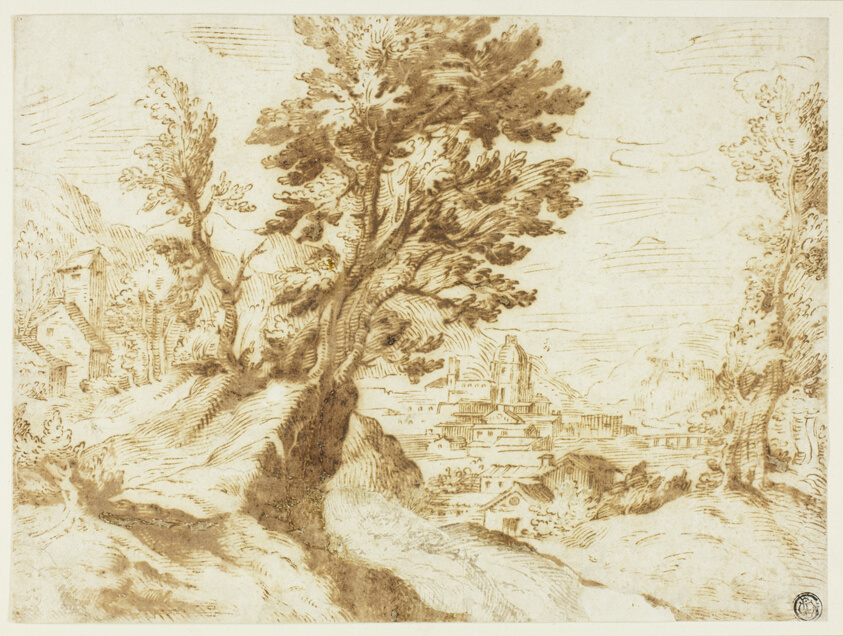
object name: Drawing and Watercolor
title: Hilly Landscape with Town in Distance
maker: Circle of Agostino Carracci; Italian, 1557-1602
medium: Pen and brown ink on ivory laid paper, laid down on ivory wove paper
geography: Italy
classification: ink or chalk wash; drawings (visual works); prints and drawing